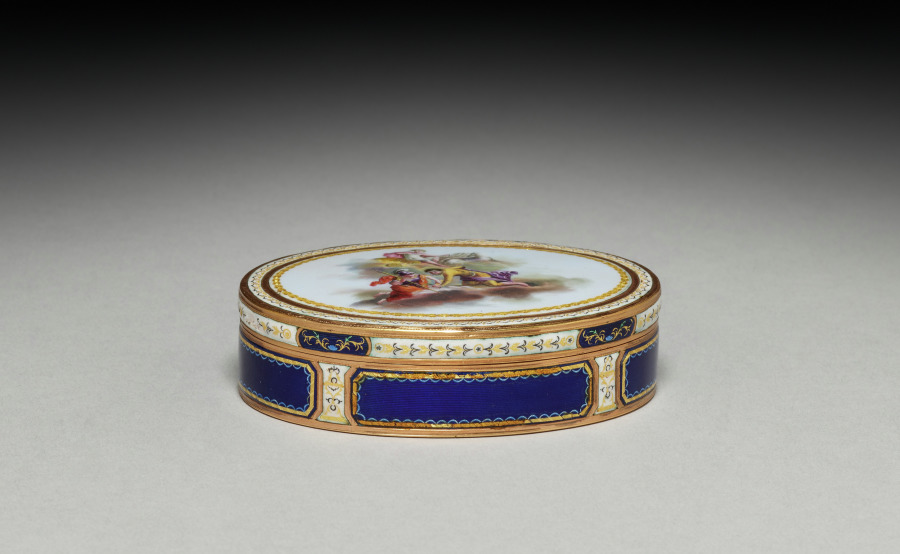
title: Box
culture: Switzerland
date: late 1700s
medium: gold and enamel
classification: Miscellaneous